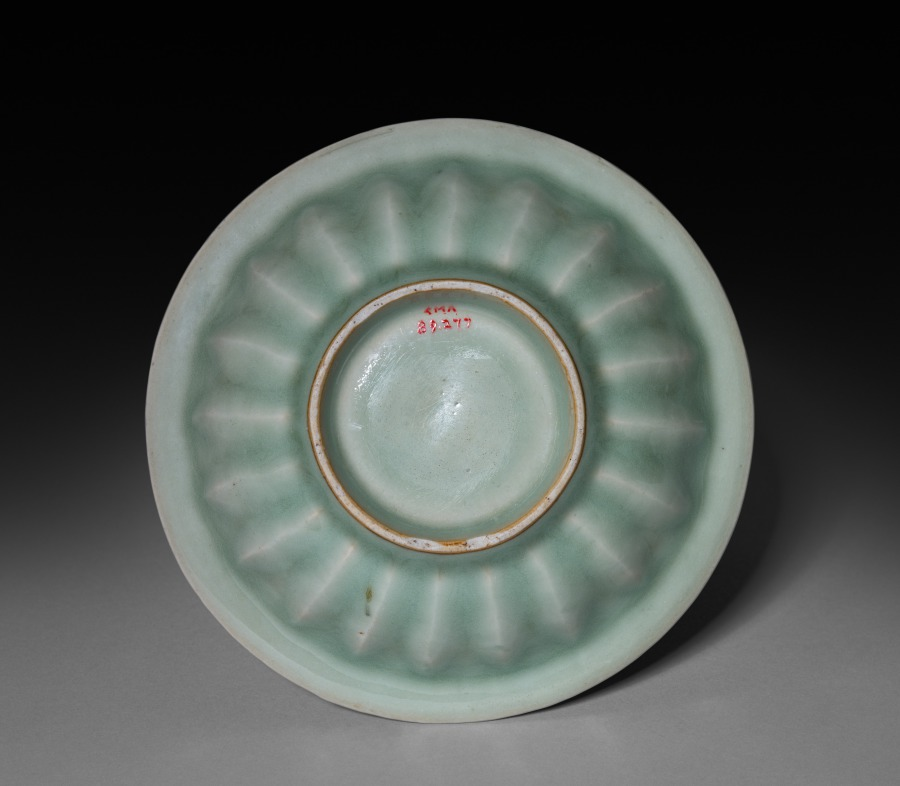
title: Dish with Two Fish in Relief: Longquan Ware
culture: China, Zhejiang province, Yuan dynasty (1271-1368)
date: early 14th Century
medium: glazed porcelain with unglazed molded decoration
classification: Ceramic